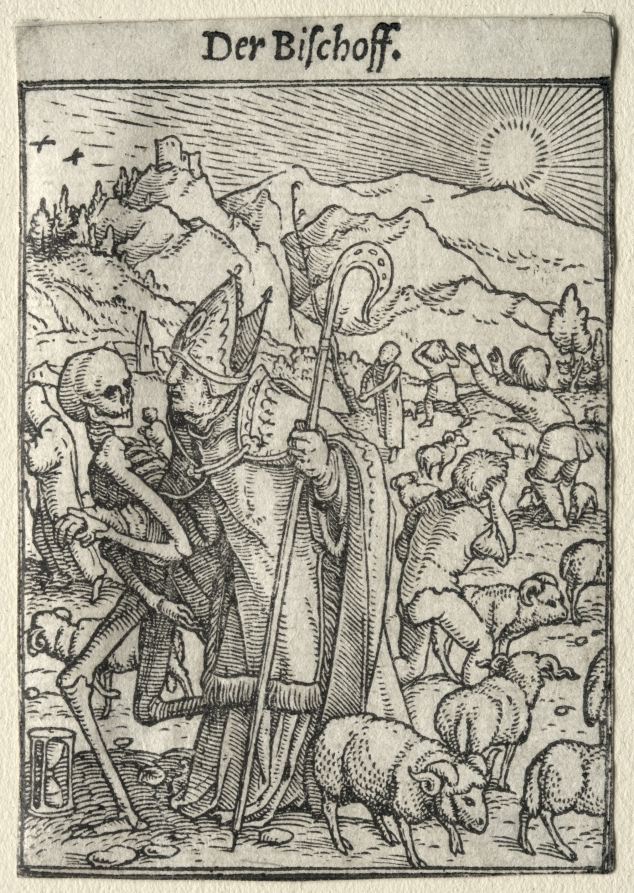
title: Dance of Death: The Bishop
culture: Germany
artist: Hans Holbein the Younger (German, active England and Switzerland, 1497/98–1543)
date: c. 1526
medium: woodcut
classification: Print